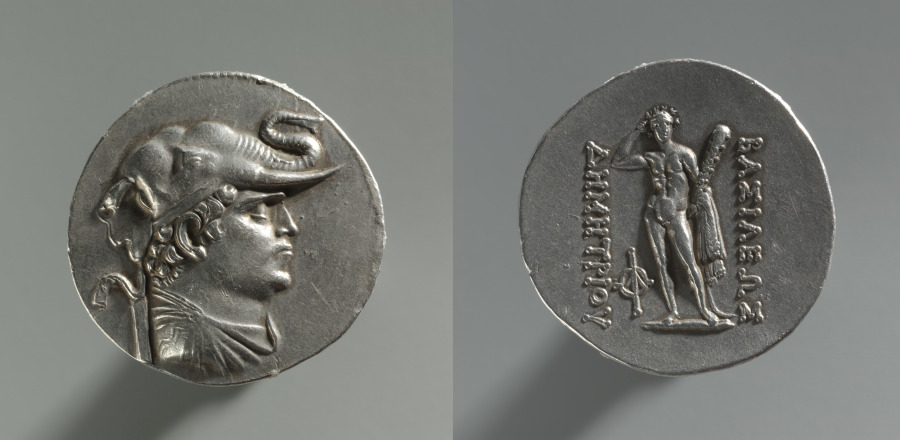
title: Tetradrachm Coin of Demetrios I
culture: Afghanistan, Bactria, Indo-Greek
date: 200–190 BCE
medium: silver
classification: Coins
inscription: BASILEOS DEMETRIOU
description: Demetrios I (222–180 BC) ruled the Indo-Greek kingdom of Bactria from 200 to 180 BC and minted this coin to commemorate his conquests over territories to the south, in present-day Pakistan. He linked his image on his coin to Alexander of Macedon (356–323 BC), who depicted himself with a lion scalp after his conquest of India; Demetrios substituted an elephant for the lion. On the reverse is Hercules, also identified with Alexander.